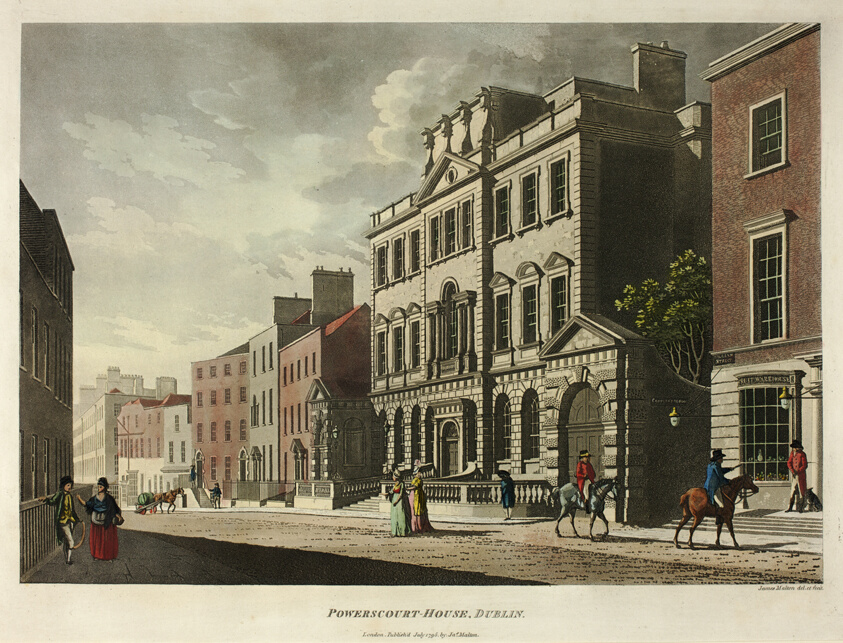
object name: Print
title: Powerscourt House, Dublin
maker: James Malton (English, 1761-1803)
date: published July 1795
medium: Hand-colored aquatint in black on ivory wove paper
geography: England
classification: aquatint; print; prints and drawing